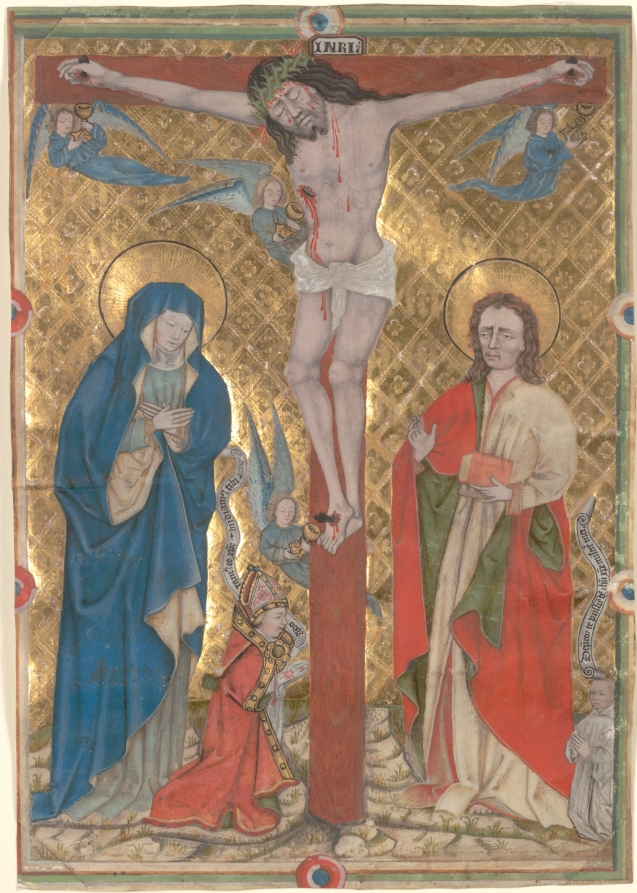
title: Single Leaf from a Missal: The Crucifixion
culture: Bohemia or Silesia, 15th century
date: c. 1480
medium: ink, tempera, and gold on vellum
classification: Manuscript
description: In addition to the Virgin and St. John, this image includes a kneeling bishop (probably the donor of the manuscript) and a kneeling Carthusian monk along the lower right-hand edge. The manuscript may have been commissioned by this unknown bishop-donor and given to a Carthusian monastery with which he had some connection. Bishops frequently donated manuscripts to ecclesiastical foundations during the Middle Ages.